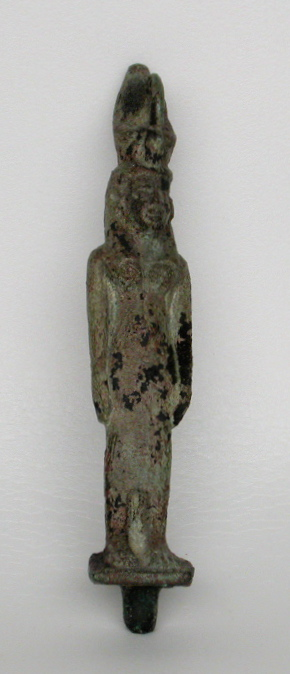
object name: Sculpture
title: Statuette of the Goddess Mut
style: third intermediate period, egyptian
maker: Egyptian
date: Third Intermediate Period, Dynasty 21–25 (about 1069–664 BCE)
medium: Bronze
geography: Egypt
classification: statuette; bronze; metal; sculpture; ancient art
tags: goddesses